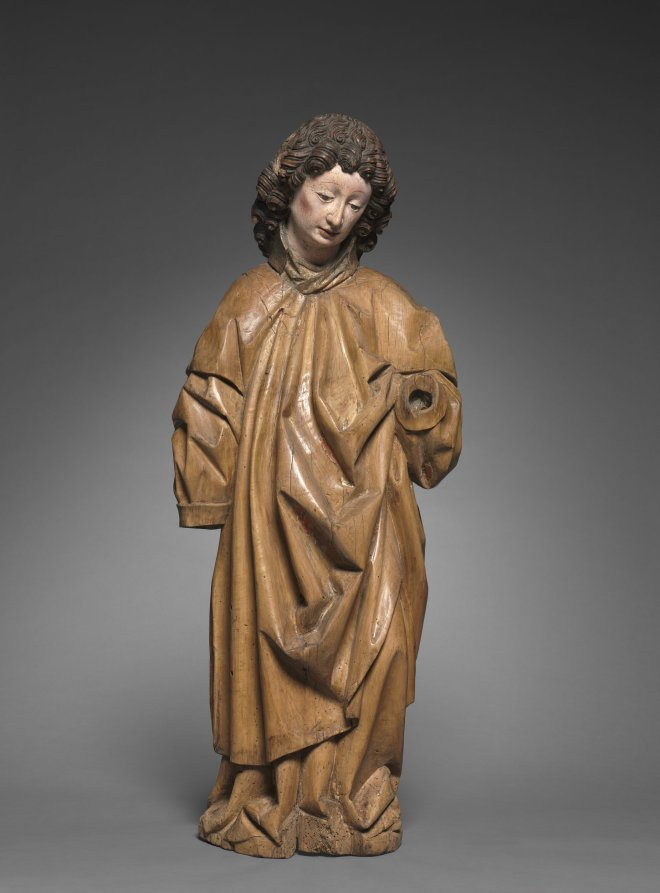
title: Saint Lawrence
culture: Austria, South Tyrol, late 15th century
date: c. 1490–1500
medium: lindenwood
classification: Sculpture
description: Lawrence of Rome (about 225–258 CE) was one of the seven deacons of ancient Rome martyred in 258 CE, and became one of the most widely venerated saints during the Middle Ages. According to tradition, he met his martyrdom by being roasted on a gridiron, an attribute which he either holds or stands upon in art. (See a depiction of him by Tilman Riemenschneider nearby in this gallery.) Lawrence is always portrayed as a young man wearing the deacon’s dalmatic. The original source and context of this sculpture is not known. Since it is not carved in the round, it was likely placed within the niche of a large altarpiece.